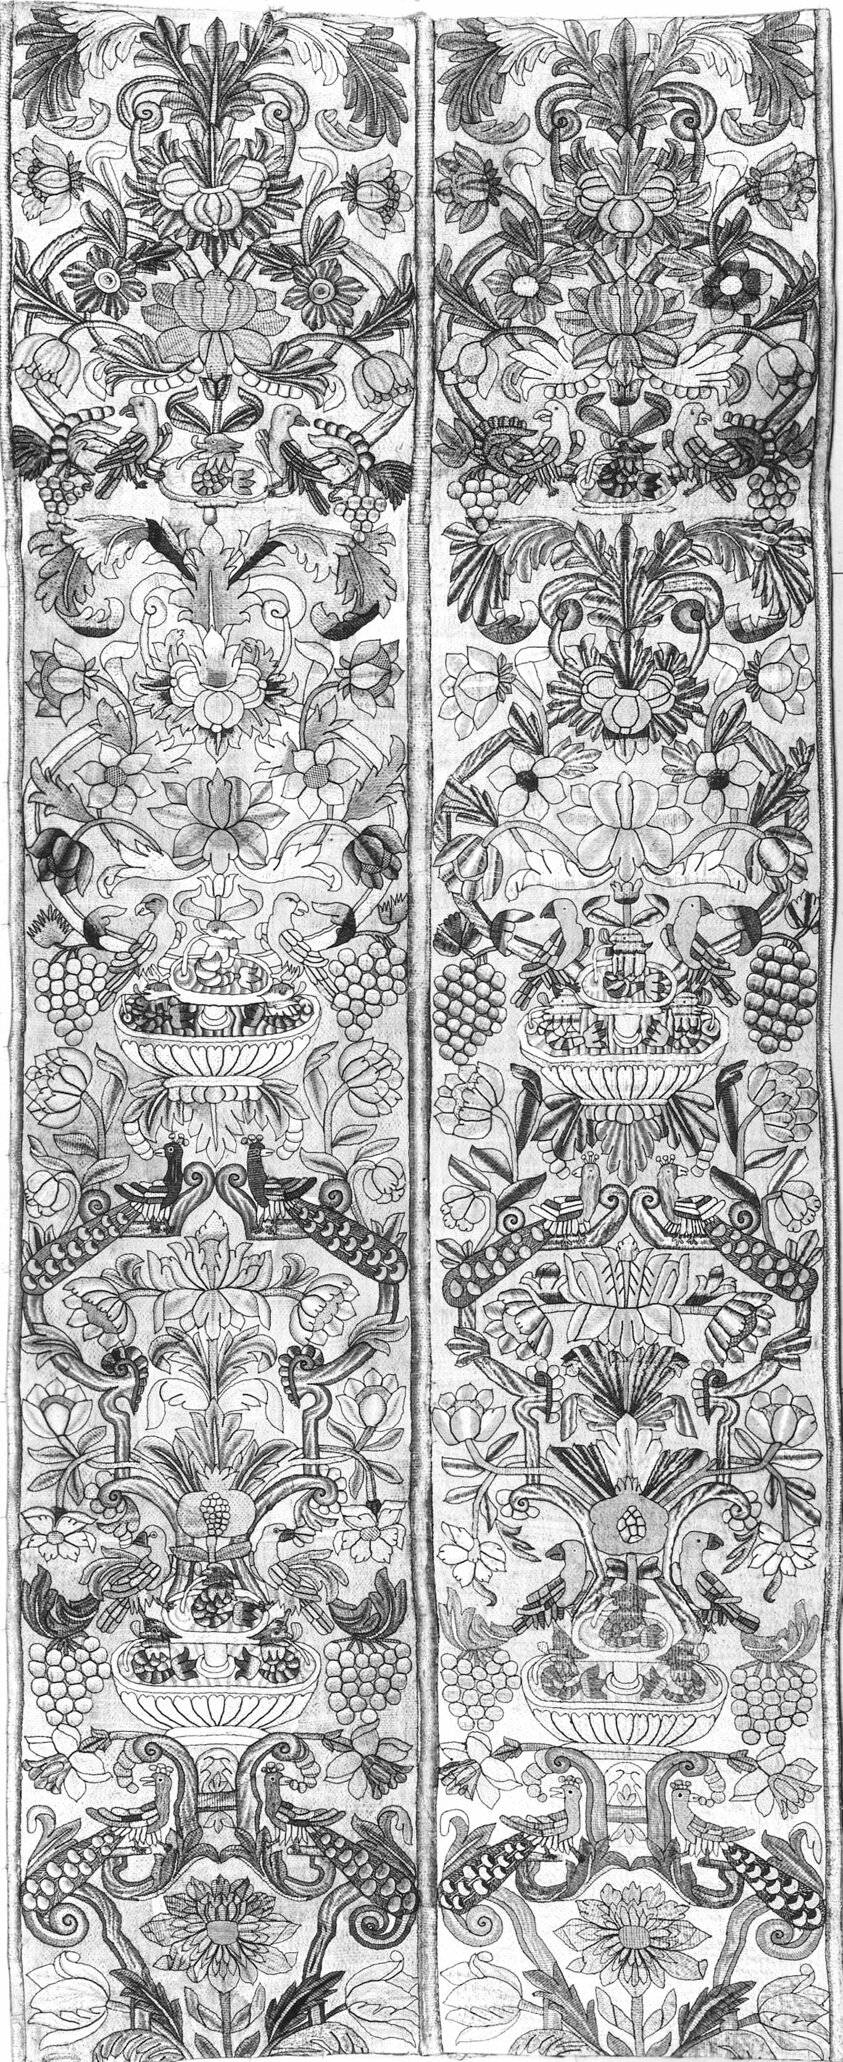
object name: Textile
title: Panel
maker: Italy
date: c. 1650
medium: Linen, plain weave; embroidered in silk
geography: Italy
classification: textile; needlework (visual works)